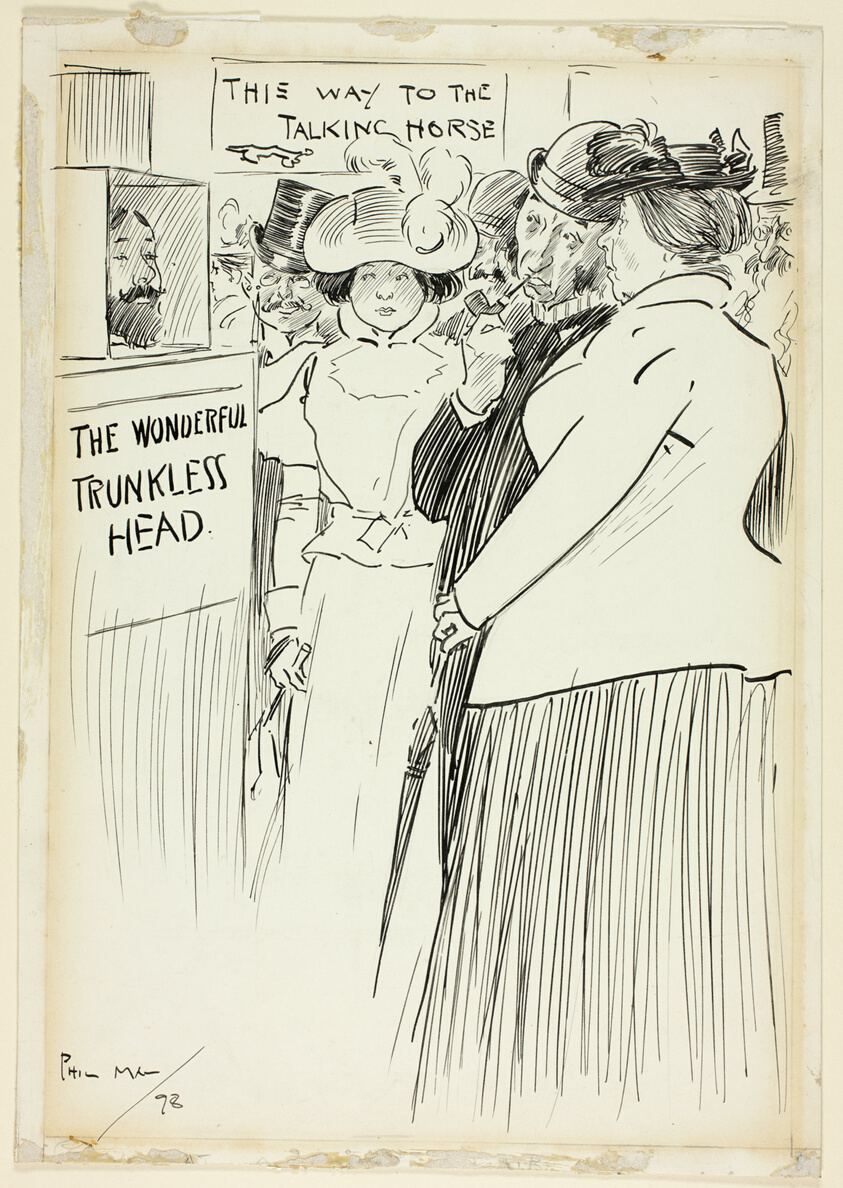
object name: Drawing and Watercolor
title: At a County Fair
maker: Philipp William May; English, 1864-1903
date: 1898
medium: Pen and black ink, over traces of graphite, on ivory wove card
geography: England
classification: pen and ink drawings; drawings (visual works); prints and drawing